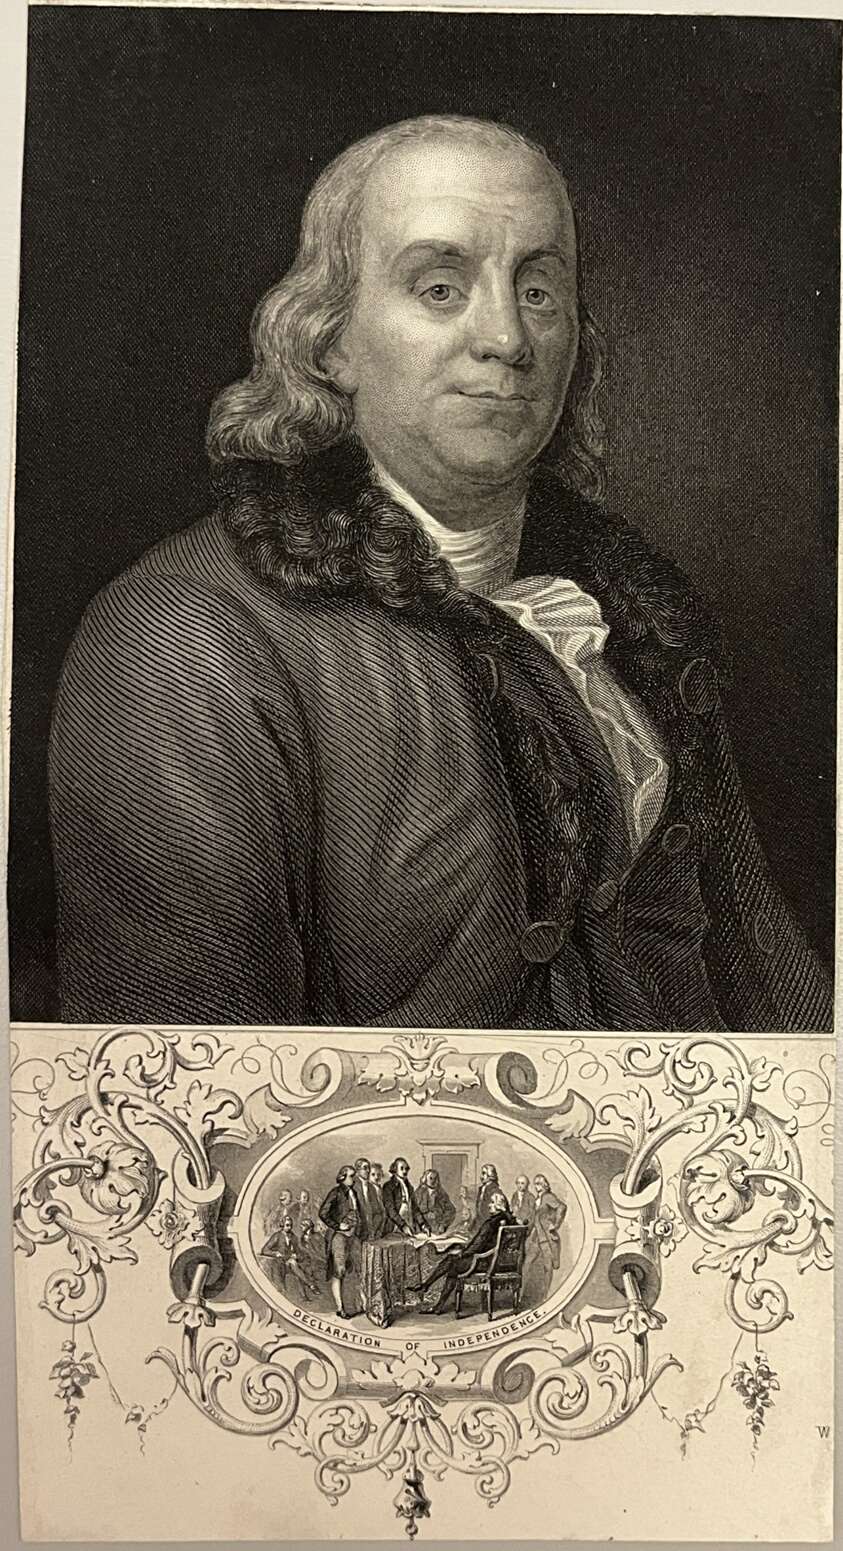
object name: Print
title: Benjamin Franklin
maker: Artist Unknown (Likely American or British, 19th century)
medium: Stipple and line engraving on paper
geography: United States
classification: reproduction; print; prints and drawing